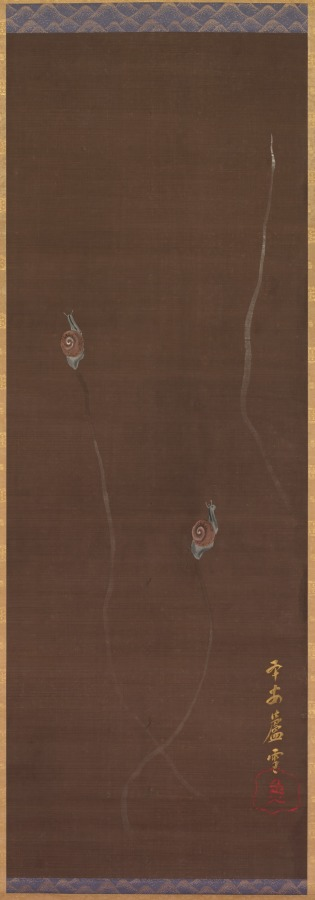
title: Snails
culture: Japan, Edo period (1615–1868)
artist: Nagasawa Rosetsu (Japanese, 1754–1799)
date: c. 1788–89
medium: Hanging scroll; ink, color, and metallic pigments on paper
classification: Painting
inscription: Inscription: 平安蘆雪; Inscription transliteration: Heian Rosetsu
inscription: Sealed: 魚; Seal transliteration: Gyo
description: In this work, Nagasawa Rosetsu carefully described two snails in a manner known as “earth painting” (doro-e), building up colors mixed with crushed white shells in emulation of the thick brushstrokes of oil paint seen in European painting. A silvery metallic pigment indicates the snails’ trails, glistening along an earthen wall. Notably, one trail has no snail, leaving the viewer to guess why.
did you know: Rosetsu was an independent painter active in Kyoto, Japan's cultural capital, known for his visual wit and superb range of technical skills.